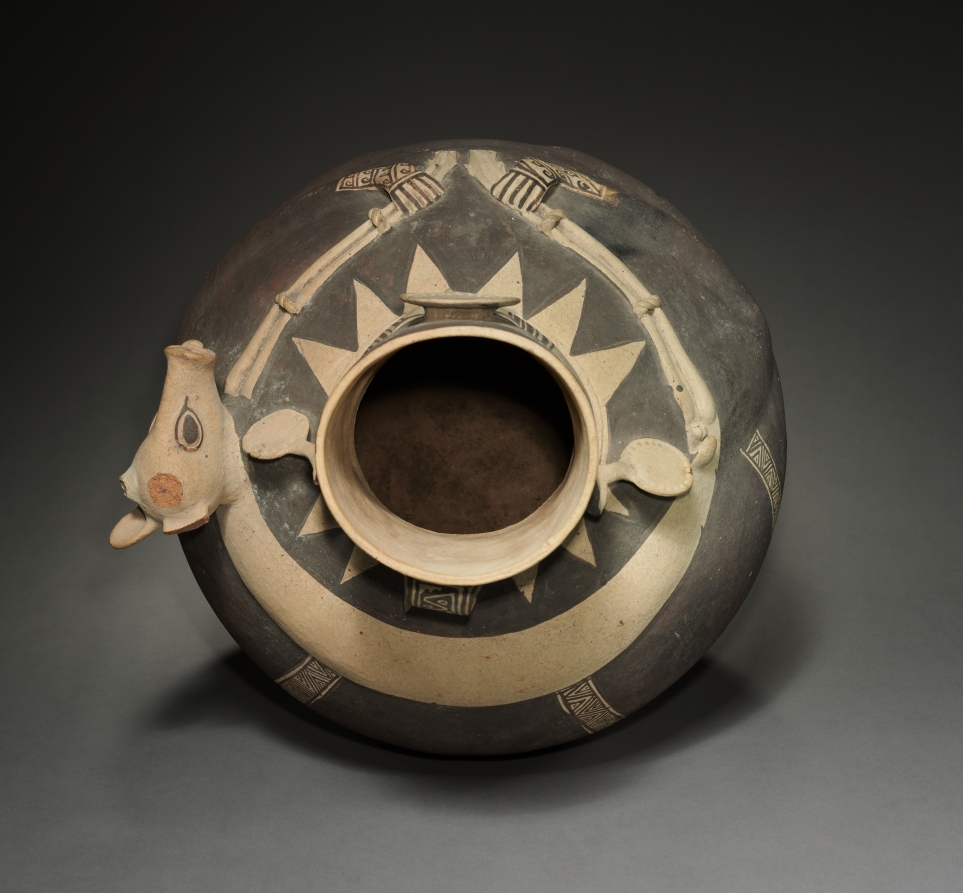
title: Vessel in the Shape of a Figure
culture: Peru, Central Coast, Chancay sytle, 12th-15th century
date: 1000–1460s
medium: earthenware with painted slip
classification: Ceramic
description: This seated figure carries a stag over his shoulders, its antlers now missing and its tongue lolling out in death. That the stag is destined for more than dinner is suggested by the human's pursed lips--perhaps the kiss-like expression of reverence that the later Inka made when approaching a sacred shrine. The animal, then, may be an offering. The two bags painted on the figure's back may be for coca leaves, also very important for rituals. In comparison to earlier ceramics, the Chancay style seems less fine both artistically and technically. yet as this vessel proves, the best Chancay ceramics have appealing charm, in part because of their bold brown-on-white color scheme.